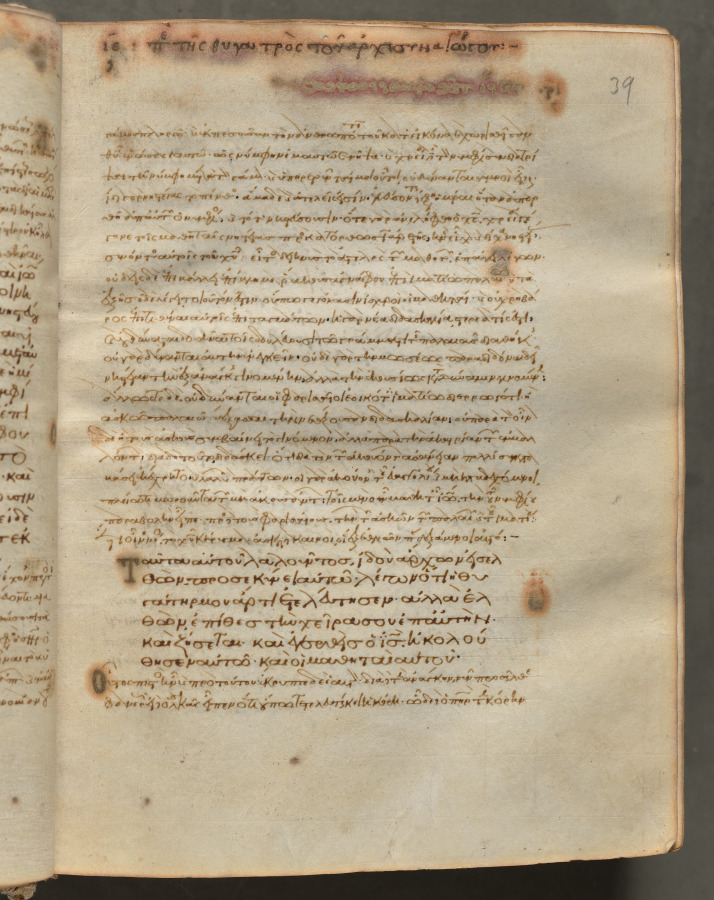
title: Text, folio 39 (recto), from a Gospel Book with Commentaries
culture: Byzantium, Constantinople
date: c. 1000–1100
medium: ink, tempera, and gold on vellum; leather binding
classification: Bound Volume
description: Each of the four gospels in this book opens on a page with brilliantly illuminated borders depicting the author of the text as well as birds-principally peacocks, symbols of the immortality of the soul-and fountains, representing the fountain of life and the salvation of the soul. This volume consists of 428 leaves with texts in Greek. Its level of sophistication suggests that it was probably written and decorated in a monastery in Constantinople.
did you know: Gospel Books were carried in procession through Byzantine churches.